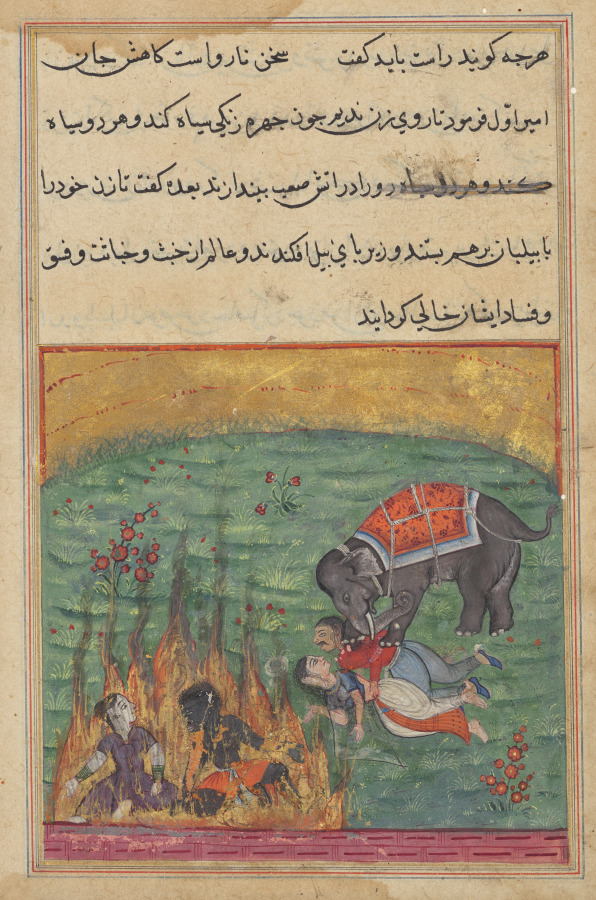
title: As punishment, the jester’s wife and the Zangi are thrown into fire and the emir’s wife and the mahout are trampled by an elephant, from a Tuti-nama (Tales of a Parrot), Twenty-second Night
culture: Mughal India, court of Akbar (reigned 1556–1605)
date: c. 1560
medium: gum tempera, ink, and gold on paper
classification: Painting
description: This painting depicts the closing scene of the tale the parrot tells Khujasta on the twenty-second night. He concludes the story by warning his mistress against committing any acts that would cause her to be laughed at and get her into trouble, like the wife of the emir, who is shown here being trampled to death along with her lover, the elephant driver. While in prison the jester caught them having sex on top of the elephant her lover had ridden up to her window. This brazen transgression made the imprisoned jester laugh so hard that the emir was alerted to the illicit affair. In the lower left the jester’s wife and her African lover, the Zangi, are being burned in punishment for their infidelity.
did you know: This painting shows features of Persian painting that transferred to India in the early Mughal court.